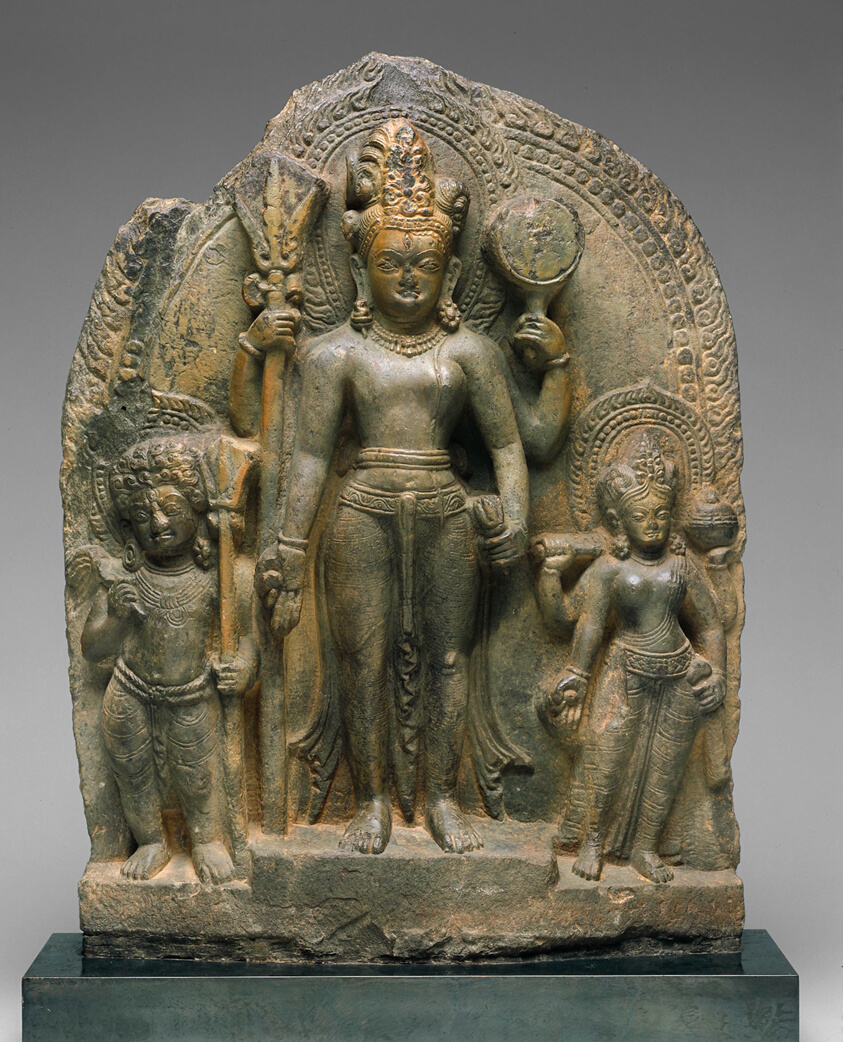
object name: Sculpture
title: Androgynous Form of Shiva and Parvati (Ardhanarishvara)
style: Himalayan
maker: Nepal; Kathmandu Valley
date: 11th century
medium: Gray schist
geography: Nepal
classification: schist; stone; sculpture; asian art